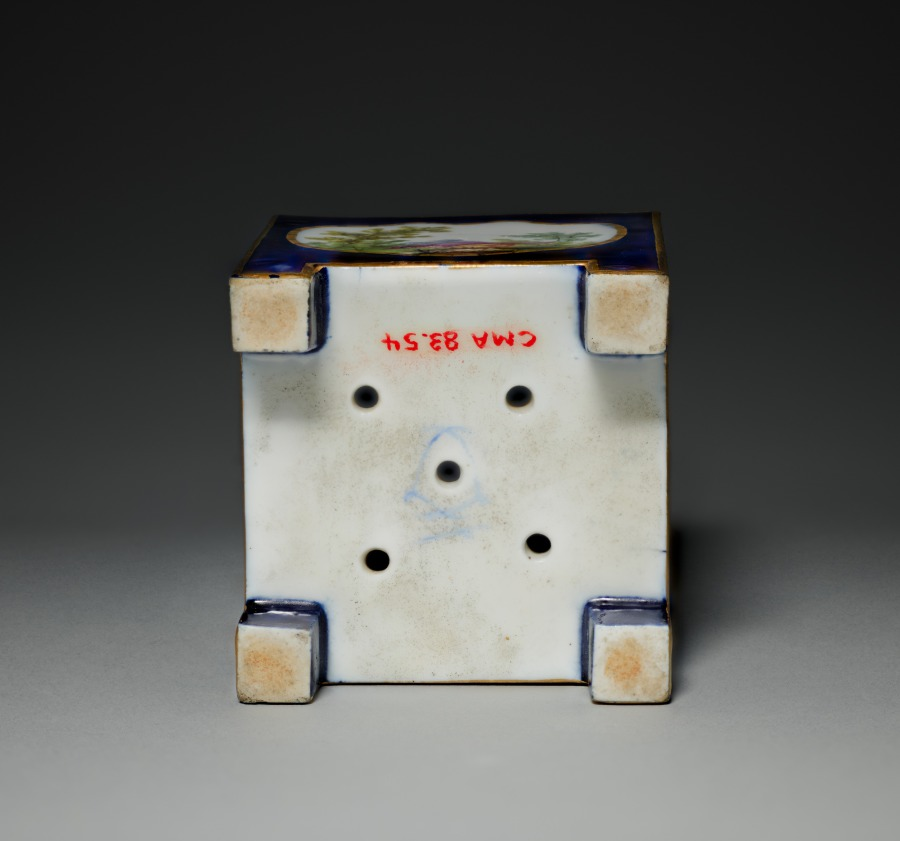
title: Tub-shaped Flower Pot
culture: France, Vincennes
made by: Vincennes Porcelain Factory (France, 1740–56)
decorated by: possibly by Etienne Evans (French, 1733–1806)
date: c. 1752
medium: soft-paste porcelain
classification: Ceramic